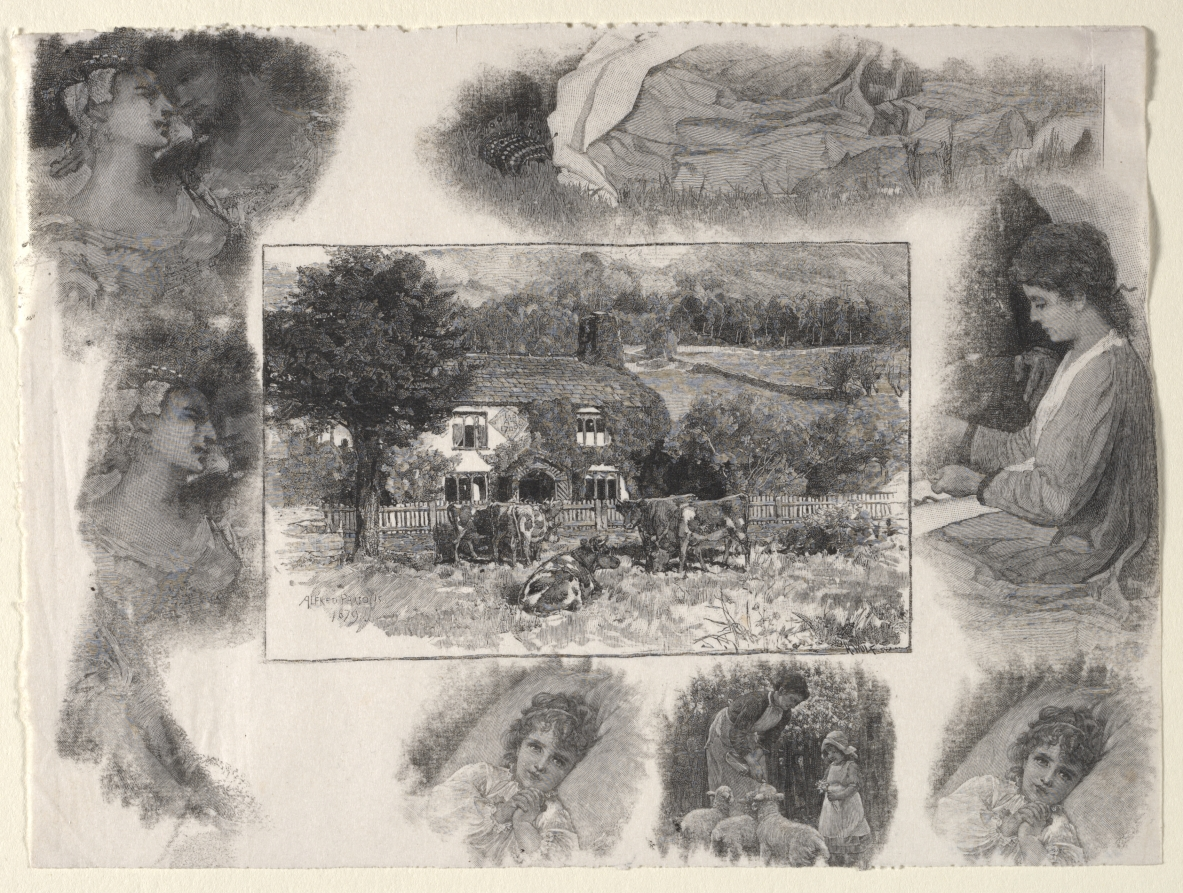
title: Landscape with Cottage and Cows Surrounded by Various Sketches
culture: America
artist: Henry Wolf (American, 1852–1916)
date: 1870–1916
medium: wood engraving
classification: Print